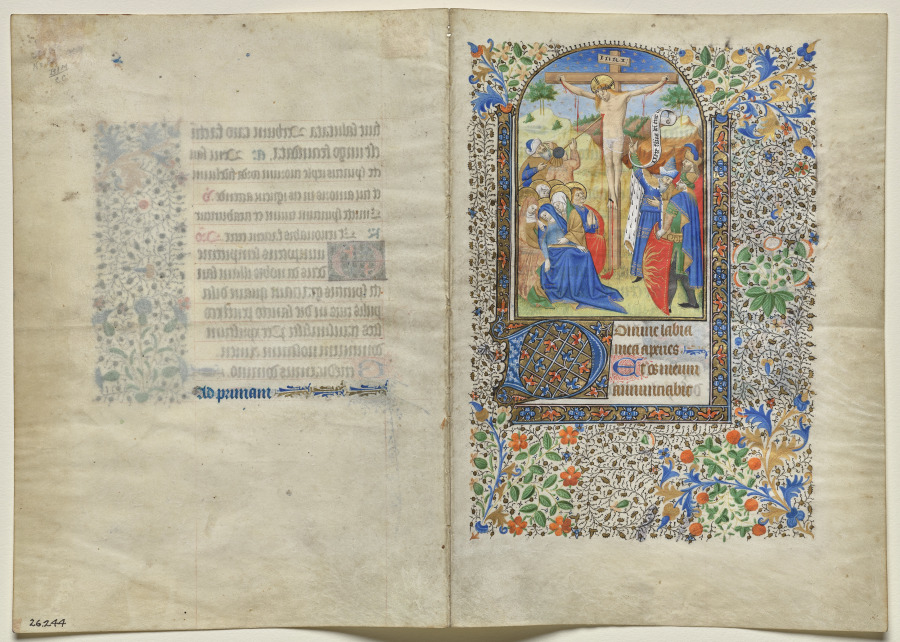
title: Bifolio from a Book of Hours: The Crucifixion: Hours of the Cross (recto)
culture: France, Angers, Nantes, or Poitiers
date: c. 1435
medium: ink, tempera, and gold on vellum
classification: Manuscript